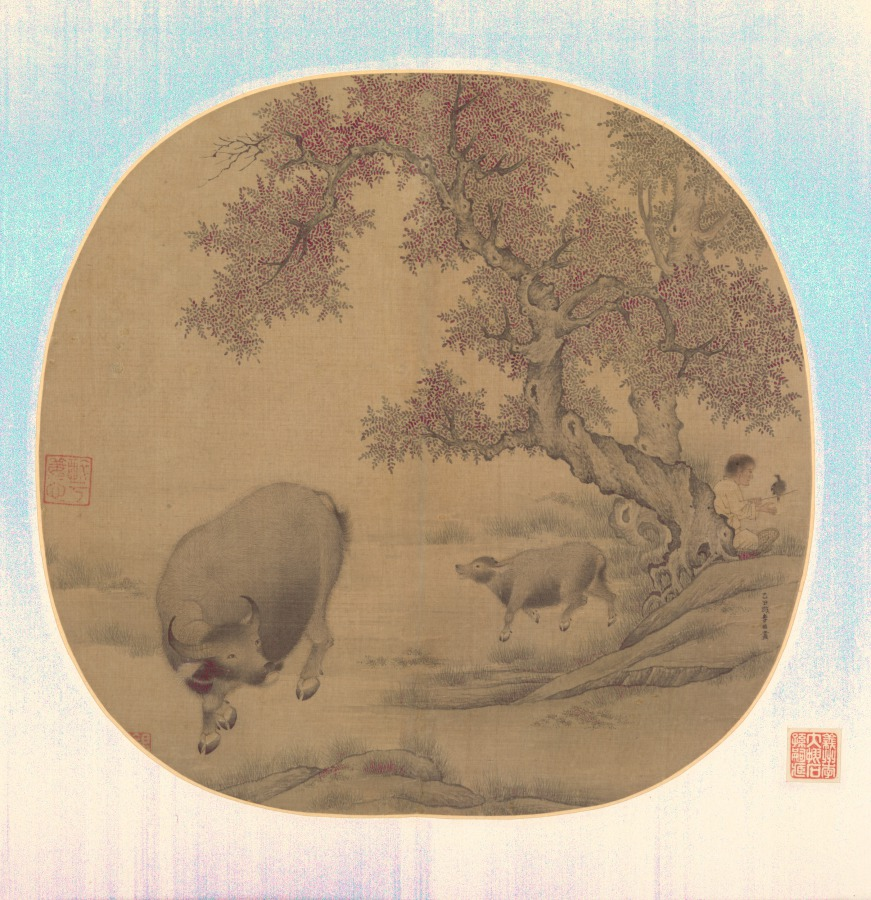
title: Man, Buffalo, and Calf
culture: China, Southern Song dynasty (1127-1279)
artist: Li You (Chinese, active c. 1145)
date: 1145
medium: album leaf; ink and color on silk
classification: Painting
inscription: Artist's inscription: 乙丑歲李祐/椿畫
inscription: 3 seals: 1 of Wu T'ing (c. 1600); 1 of An Kuo (1481–1534); 1 of Li Pao-hsün (1858–1915)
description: Here, a herdboy tending a cow with a calf is sitting beneath a tree with his pet myna bird. The painting can be read as a pastoral scene. As the water buffalo helped plow the fields, it was perceived as an animal that endures hard work without gain for itself, often interpreted as a metaphor for the official. Ox-herding pictures, presented as gifts in court circles, were used for their moral and political rhetoric. The Yijing (Book of Changes) states, The Receptive is the earth, the mother . . . it is a cow with a calf . . . the multitude [in relation to the ruler].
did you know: Li You included such tiny details as circular patterns of hair on the buffalo’s hindquarters.